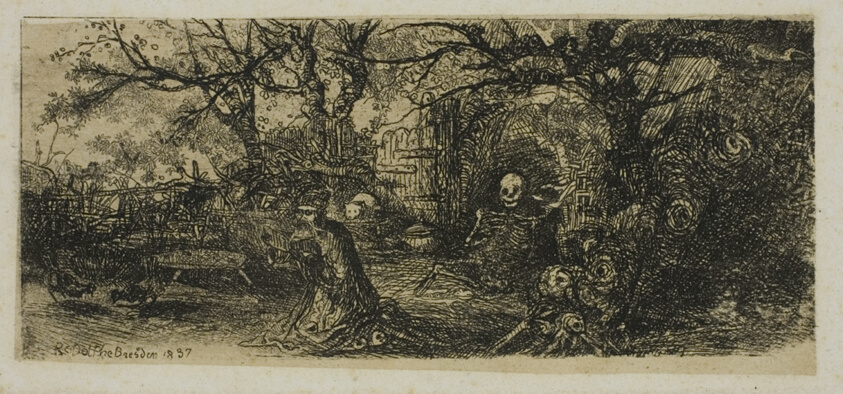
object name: Print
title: St. Anthony and Death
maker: Rodolphe Bresdin (French, 1825-1885)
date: 1837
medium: Etching on cream China paper laid down on white wove paper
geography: France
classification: etching; print; prints and drawing